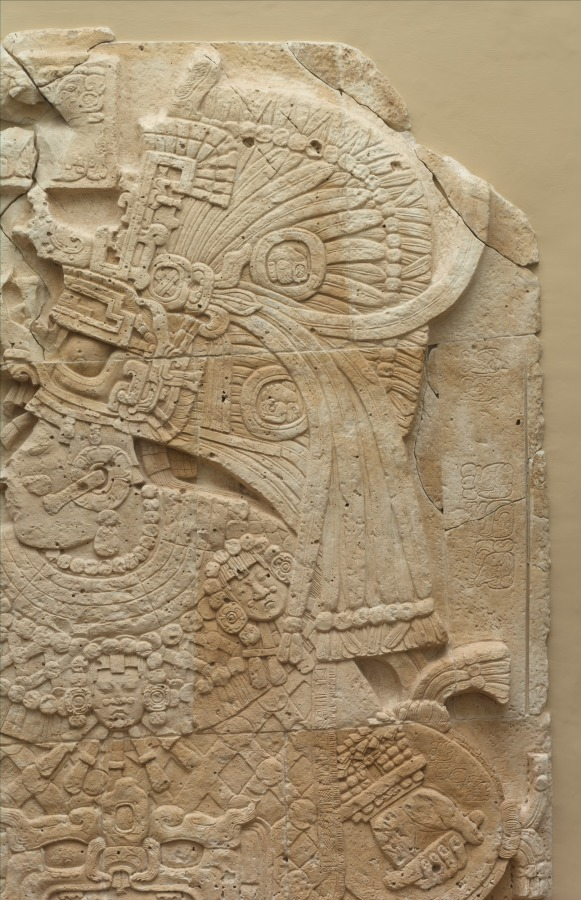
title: Front Face of a Stela (Free-standing Stone with Relief)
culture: Mesoamerica, Guatemala, Department of the Petén, El Perú (also known as Waka'), Maya (250-900), Classic period (200-1000)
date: 692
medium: limestone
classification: Sculpture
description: In stone sculpture, Maya rulers celebrated the milestones of their reigns with flamboyant portraits like this image of a royal woman, created to mark the passage of a twenty-year period known as the k’atun. She originally stood in a plaza next to a portrait of her spouse (see photo), with whom she ruled El Perú-Waka’, a provincial Maya town. A member of the powerful dynasty of a nearby Maya center, she seems to have held higher authority than her husband, serving as a military governor. Her costume reflects her status: the headdress has a fan of green quetzal feathers and her jewelry probably refers to jade-both among the most prized of ancient materials. Jade beads also may form the net over her garment, belted with the head of a fish-like creature. Completing the costume are the scepter and shield she grasps in her hands. The dwarf at her side may be a court attendant. The hieroglyphic text refers to important dynastic dates.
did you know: The powerful Maya queen shown on this stela is known as Lady K’abel.